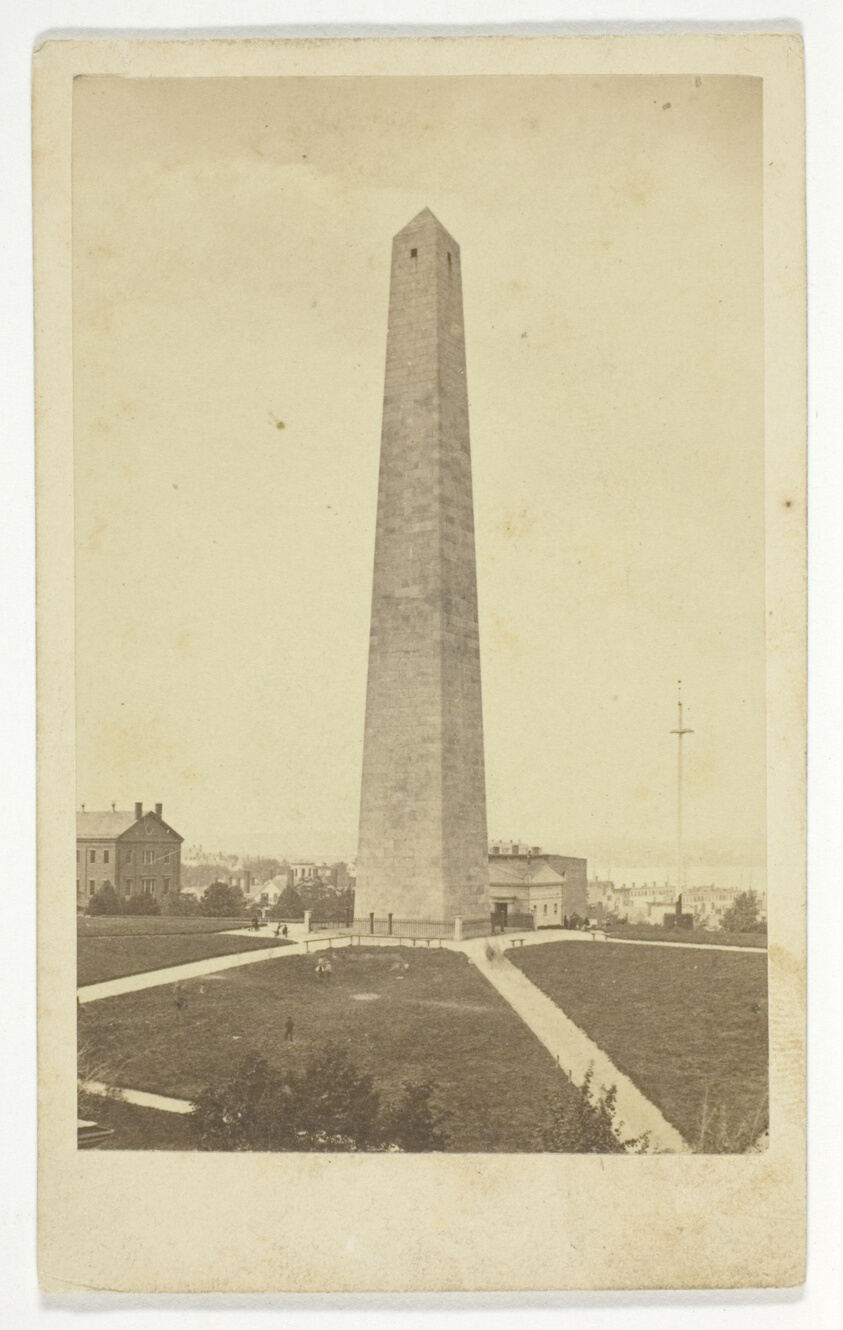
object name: Photograph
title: Bunker Hill Monument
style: 19th century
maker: Allen (American, late 19th–early 20th century)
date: 1875/1900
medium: Albumen print (carte-de-visite)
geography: United States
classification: carte-de-visite (albumen); albumen silver print; photographic process; photography; card photographs; photograph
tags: Collected by Hugh Edwards